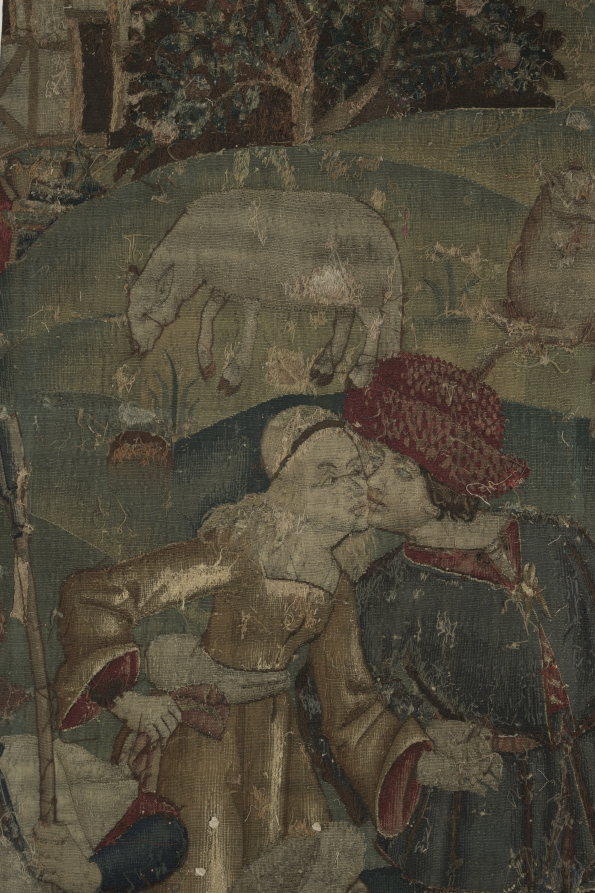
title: Shepherds in a Round Dance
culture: Netherlands, early 16th century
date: around 1500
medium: Wool and silk: tapestry weave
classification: Tapestry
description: Late medieval tapestries often use a limited yet contrasting color palette to portray stylized images. The expressions of these figures, for example, are conveyed more by their postures than by their faces. Four shepherds and shepherdesses join hands and dance to the music of a bagpiper at the far right, while a lord and two ladies on the left look on. A dog and sheep amid blossoming plants and trees contribute to the festive pastoral scene in front of a castle.